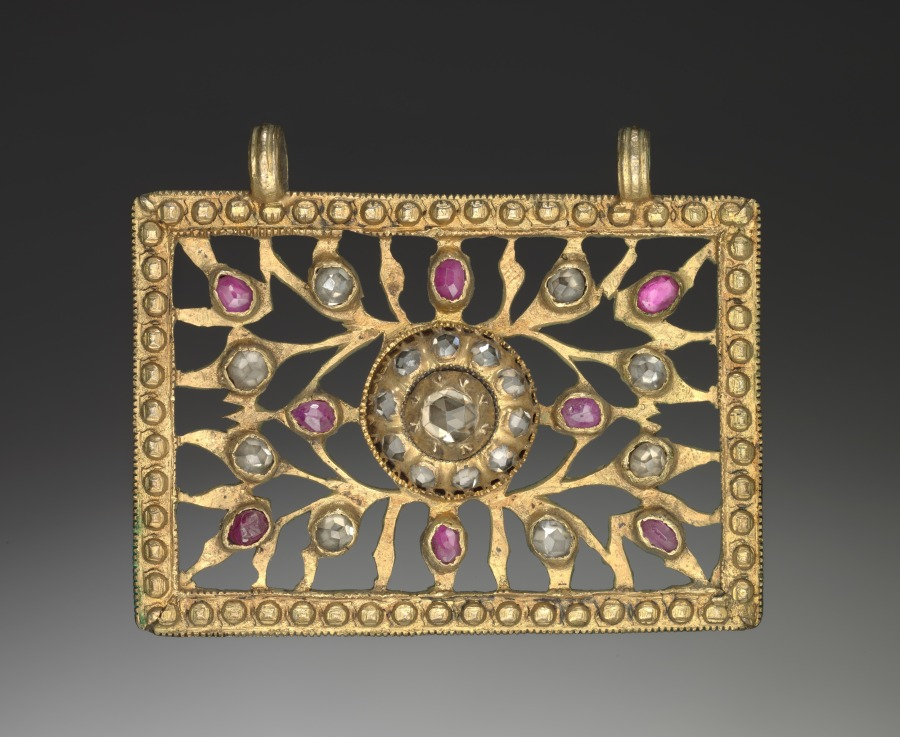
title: Pendant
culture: India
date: early 1900s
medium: silver gilt with rubies and diamonds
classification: Jewelry